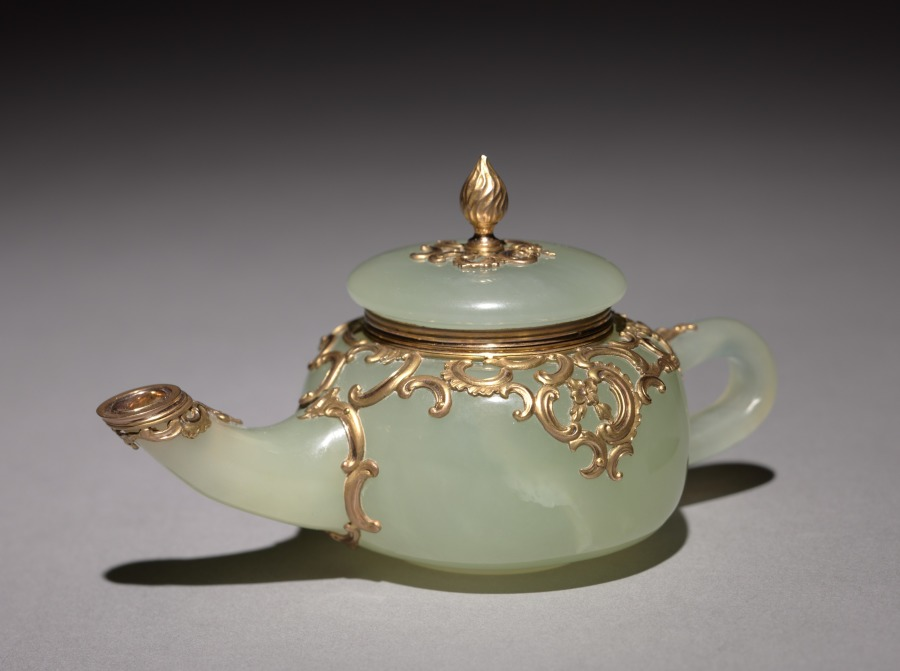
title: Miniature Teapot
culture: Russia, St. Petersburg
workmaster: Mikhail Evlampievich Perkhin (Russian, 1860–1903)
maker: House of Fabergé (Russian, 1842–1918)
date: 1886–96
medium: gold, bowenite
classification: Miscellaneous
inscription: Impressed marks: 56, crossed anchors [assay mark for St. Petersburg, 1882-96]; initials of workmaster Mikhail Perkhin (in Cyrillic); Fabergé (in Cyrillic)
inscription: Scratched: 47274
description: The House of Fabergé specialized in the creation of little treasures intended as opulent personal gifts. In creating luxurious accessories for a desk or tabletop, Fabergé often used native hardstones such as multicolored agate and quartz, green nephrite, pink rhodonite, rock crystal, and pale green bowenite found in the Ural Mountains of western Russia. Fabergé's designers often paired hardstones with gold mounts, particularly in the St. Petersburg workshop where the goldsmiths were concentrated.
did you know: Sometimes called "new jade," bowenite is actually considered a semiprecious gemstone. Though Fabergé obtained his supply from the Ural Mountains of Russia, bowenite is also the state mineral of Rhode Island.